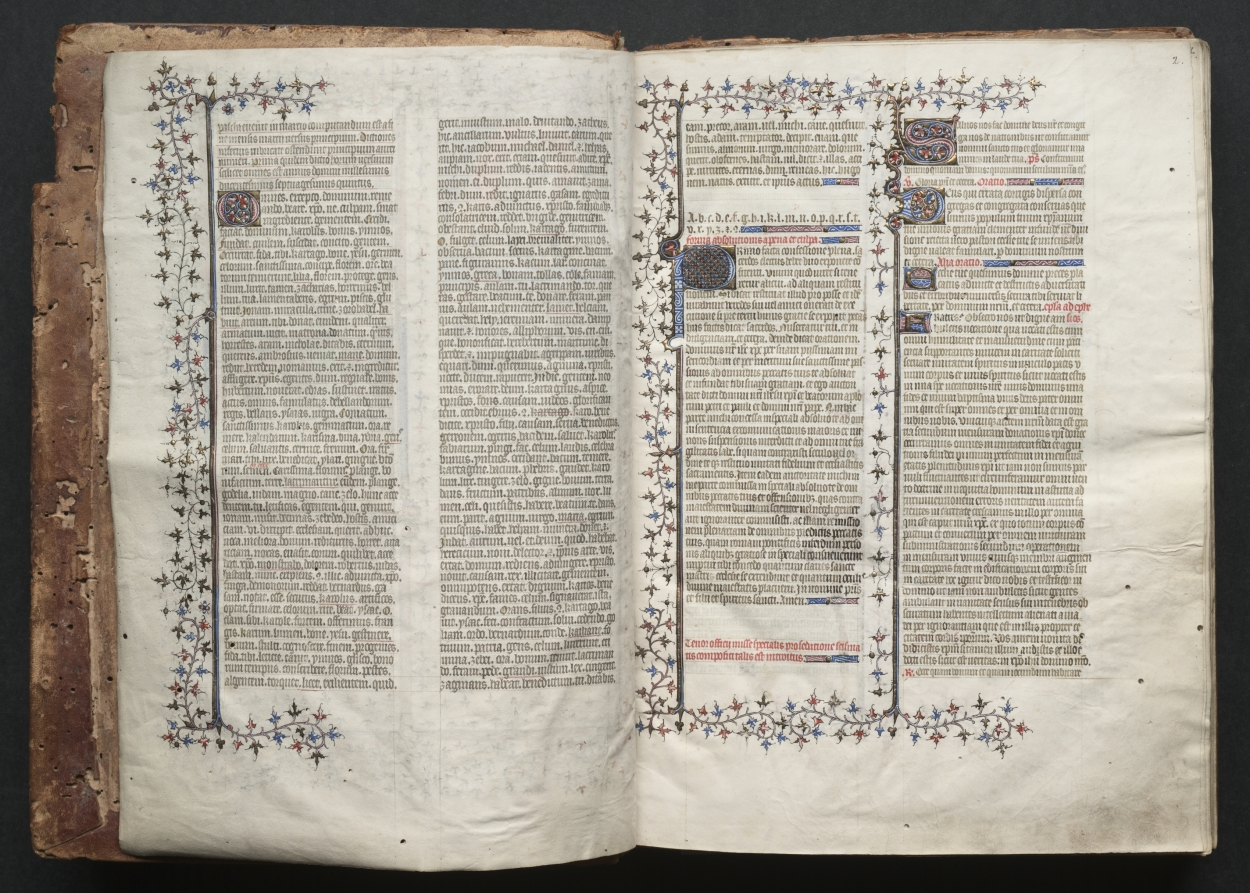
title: The Gotha Missal: Fol. 1v, Text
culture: France, Paris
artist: Master of the Boqueteaux (French)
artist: and Workshop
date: c. 1375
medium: ink, tempera, and gold on vellum; blind-tooled leather binding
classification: Bound Volume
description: The style and quality of this manuscript's decoration is typical of deluxe Parisian books made for aristocratic or royal patrons. Most of the book's decoration appears to be the work of the Master of the Boqueteaux, an artist active at the court of King Charles V (died 1380). His style was apparently shared by a number of book illuminators working in and around Paris. It is very possible that the Gotha Missal belonged to Charles V, but is not provable because the manuscript has no royal portraits and lacks a colophon. Given the book's magnificent decoration, however, it would seem that it was produced for a Valois prince, if not for the king himself. The manuscript receives its name from the German dukes of Gotha, its later owners.